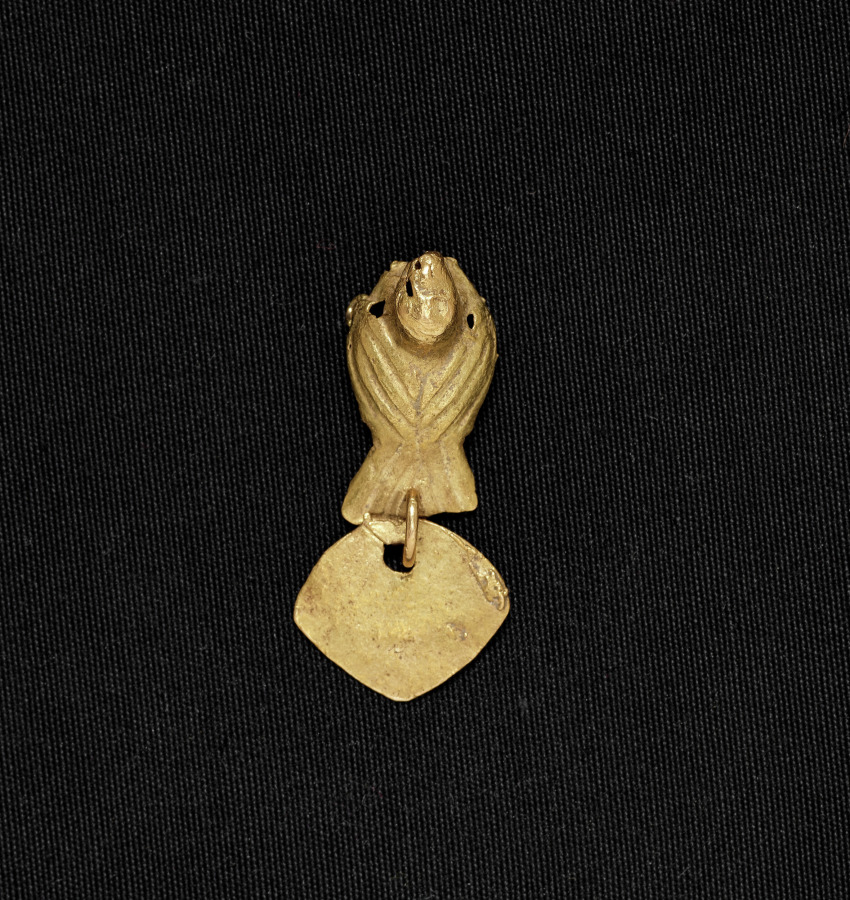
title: Bird Bead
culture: Colombia, Muisca style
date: c. 900–1550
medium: cast gold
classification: Jewelry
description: Muisca metalwork divides into two categories: ornaments to be worn, such as these, and offering figurines, in the case to the right. The elaborate bird pendant features delicate herringbone moldings, openwork patterns, and wing details-all part of the wax model from which the pendant was cast (see nearby computer animation). The dangles were attached after casting.